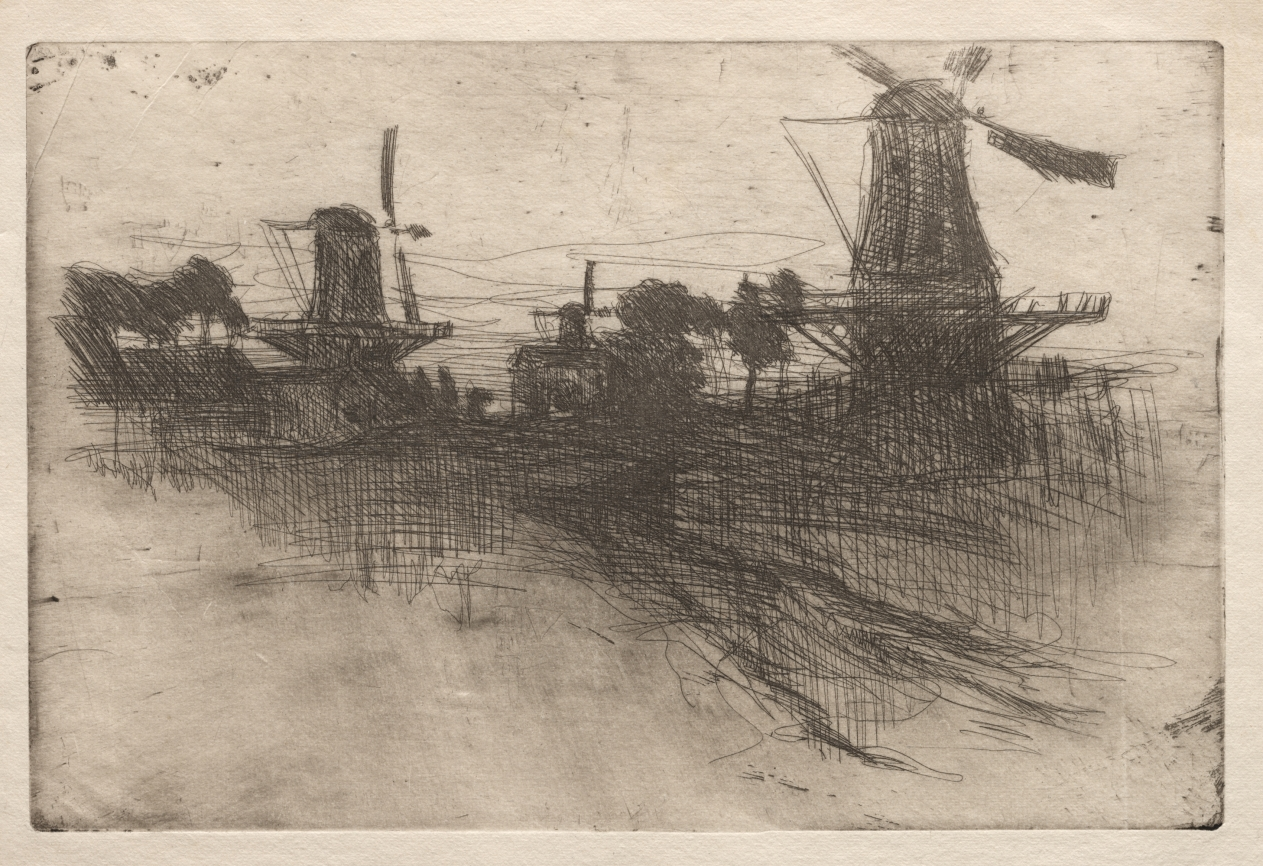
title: Evening, Dordrecht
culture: America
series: 17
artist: John Henry Twachtman (American, 1853–1902)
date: 1881–1883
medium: etching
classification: Print